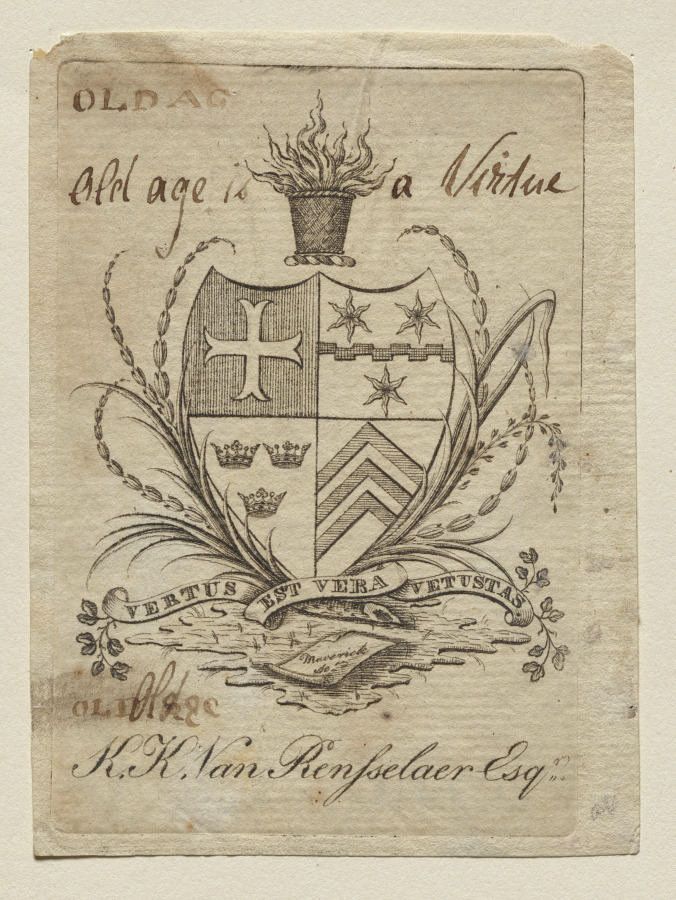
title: Bookplate: Coat of Arms with K. K. Van Rensselaer, Esq. inscribed below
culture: America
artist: Peter Rushton Maverick (American, 1755–1811)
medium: engraving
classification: Print